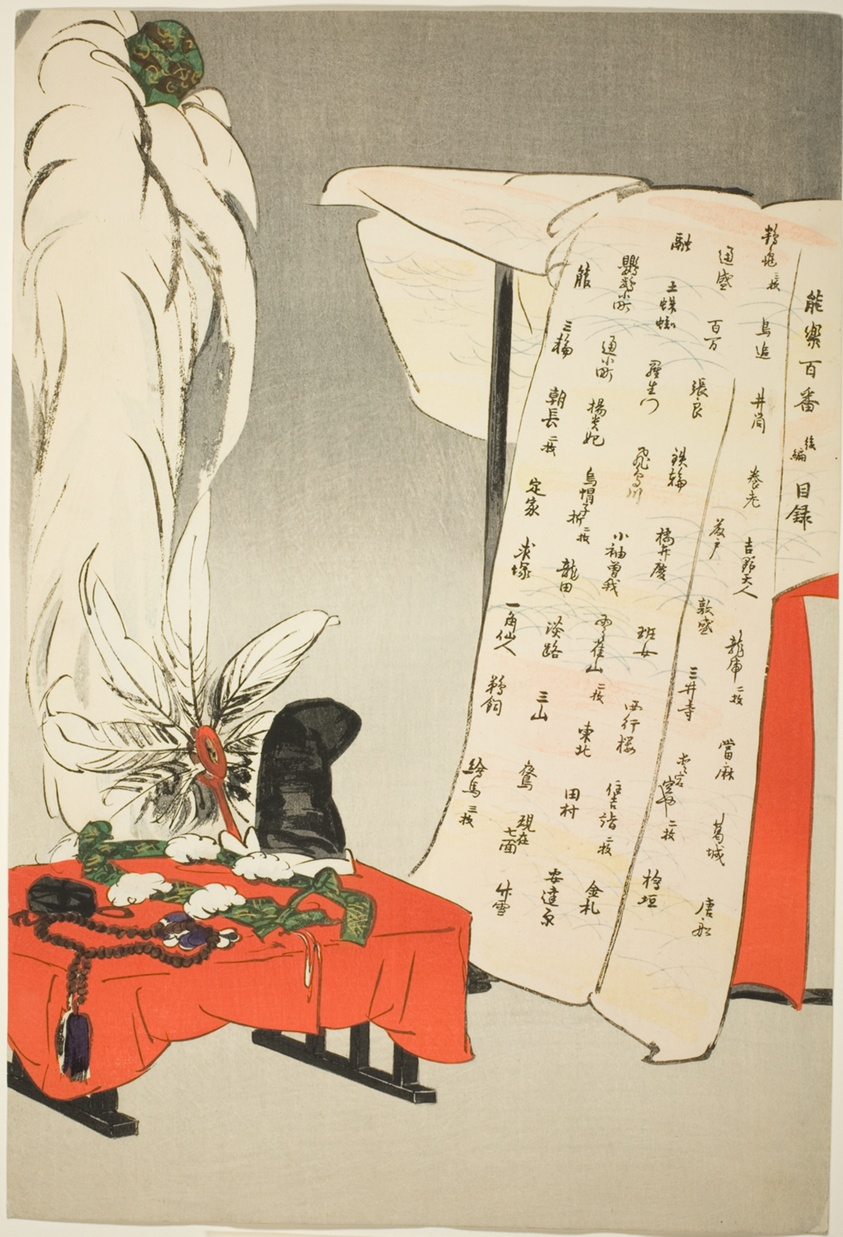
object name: Print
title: Index Sheet, , from the series "One Hundred No Dramas (Nogaku hyakuban)"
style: Japanese (culture or style)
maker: Tsukioka Kogyo; Japanese, 1869-1927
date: 1898/1903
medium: Color woodblock print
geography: Japan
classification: woodblock print; print; asian art